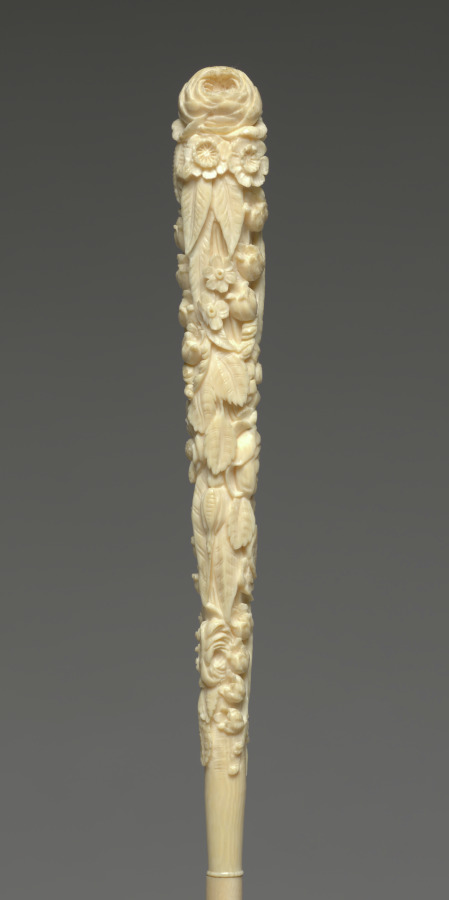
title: Lace Parasol with Ivory Handle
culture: Belgium, Brussels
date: 1880–99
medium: Needle lace and bobbin lace (Point Duchesse Lace) with carved ivory handle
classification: Lace